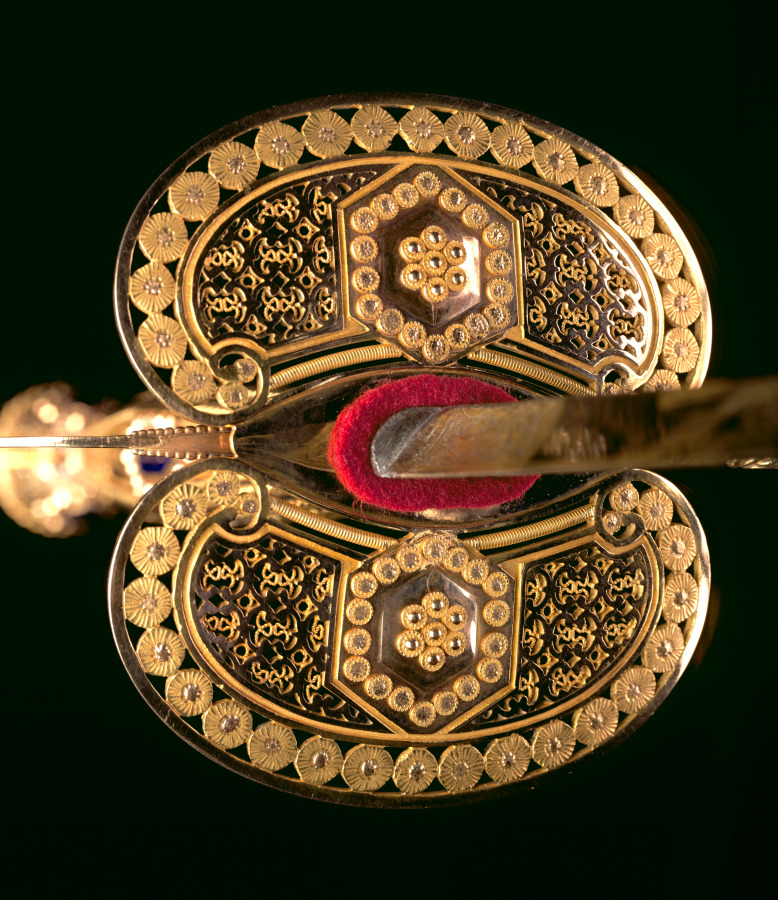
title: Small-Sword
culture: Switzerland, Geneva(?) (blade: Germany, Solingen, early 18th c.), late 18th Century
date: c. 1790–1800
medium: hilt: gold with blue translucent enamel; blade: etched, blued and gilded steel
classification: Arms and Armor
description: This example shows the small-sword at its latest and most refined stage of development. Though highly reflective of French taste, it was probably fashioned in a Swiss workshop under French influence or by a French craftsman working in Switzerland. Worn publicly as an emblem of social rank, this sword was likely custom-made for an affluent individual to use on formal or court occasions. So-called because of its short blade, the small-sword emerged as the light and quick weapon of choice for aristocratic civilians during the 1700s. Such a sword was traditionally suspended at about mid-thigh from the left side of a belt, the hilt exposed through the opening of the gentleman's coat. Highly visible, the hilt invited lavish decoration through precious materials such as gold and enamels, as seen here. Considered a type of masculine jewelry at that time, small-swords featured a variety of hilt styles that went in and out of fashion. Many were decorated to match personal costume, and jewelers worked on the finest small-swords of the day.